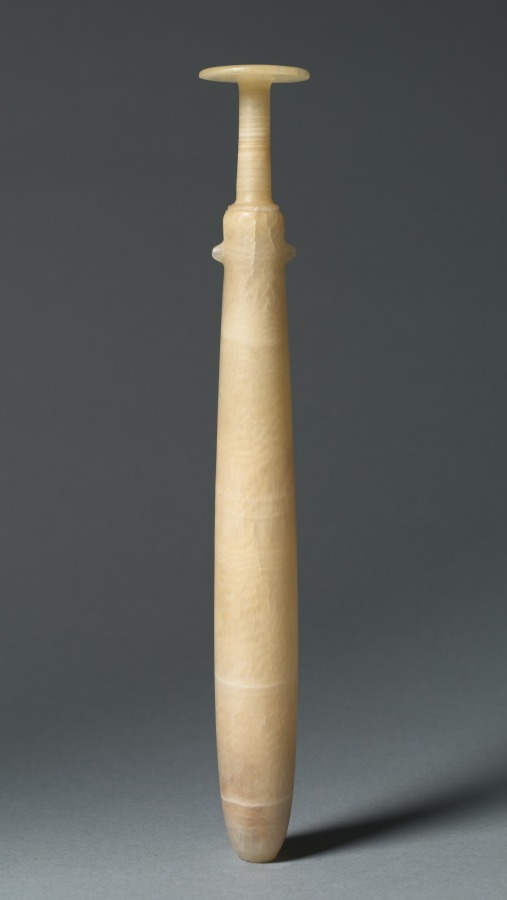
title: Alabastron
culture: Egypt, Greco-Roman period (332 BCE–395 CE), Ptolemaic dynasty (305–30 BCE)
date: 305–222 BCE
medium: travertine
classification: Vessels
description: Both ancient Egyptian men and women loved cosmetics. Unguents, oils, and perfumes made from aromatic plant resins and gums were obtained at great cost from distant lands. The objects identified with cosmetics were given lavish treatment.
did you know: This perfume holder might have been attached to a string, making it easily portable.